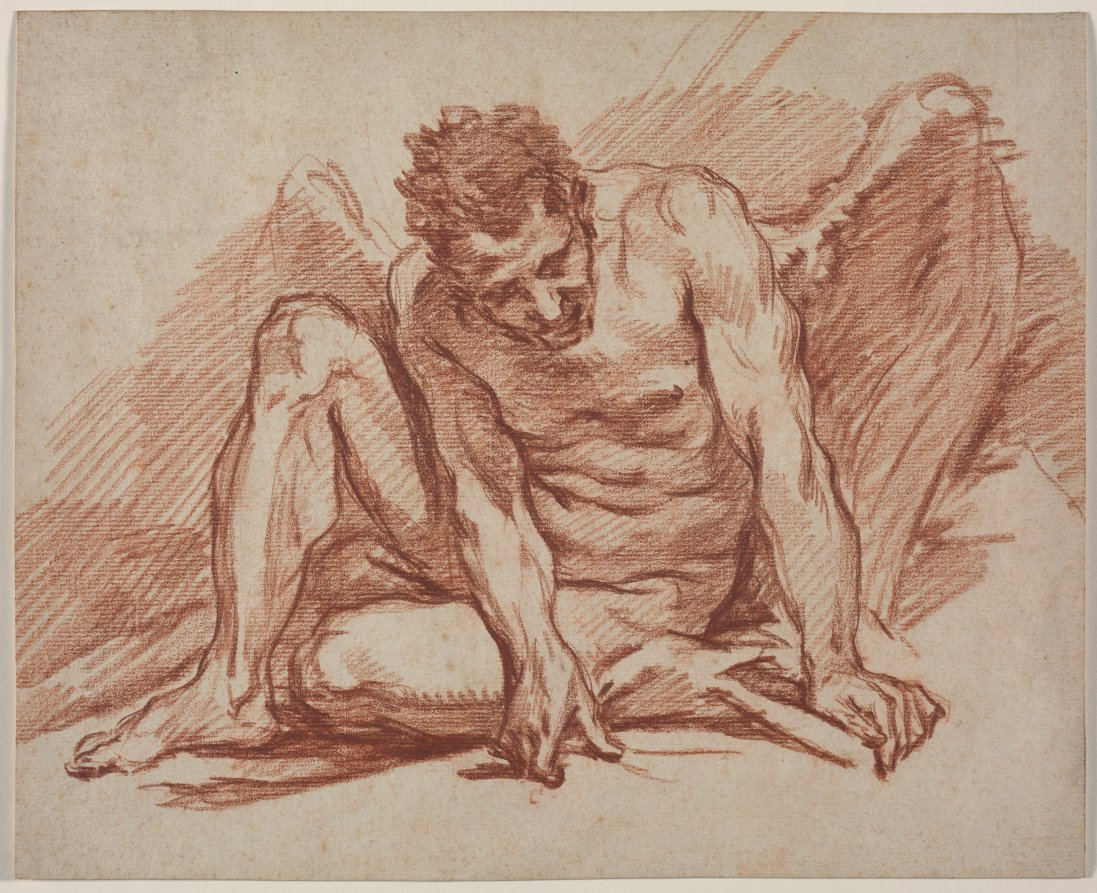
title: Male Academy with Wings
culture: France, 18th century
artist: François Boucher (French, 1703–1770)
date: 1745–50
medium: red chalk on cream laid paper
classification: Drawing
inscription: verso, upper left, in graphite: M; center right, in graphite: [c--c 2ff?] [sideways]; lower right, in graphite: [illegible, partially erased inscription four lines long]; lower center, in graphite: M[illegible]; lower right, in graphite: pr cadre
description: Academically trained artists often practiced drawing live models. Called academies, these figure studies occasionally served as preparatory drawings for paintings. Some artists crafted their academies to appeal to collectors interested in contemplating technical skill and inventiveness. Boucher may have imaginatively given wings to this male nude, who does not appear in any known painting, to demonstrate his ingenuity by transforming the model into a mythological figure.